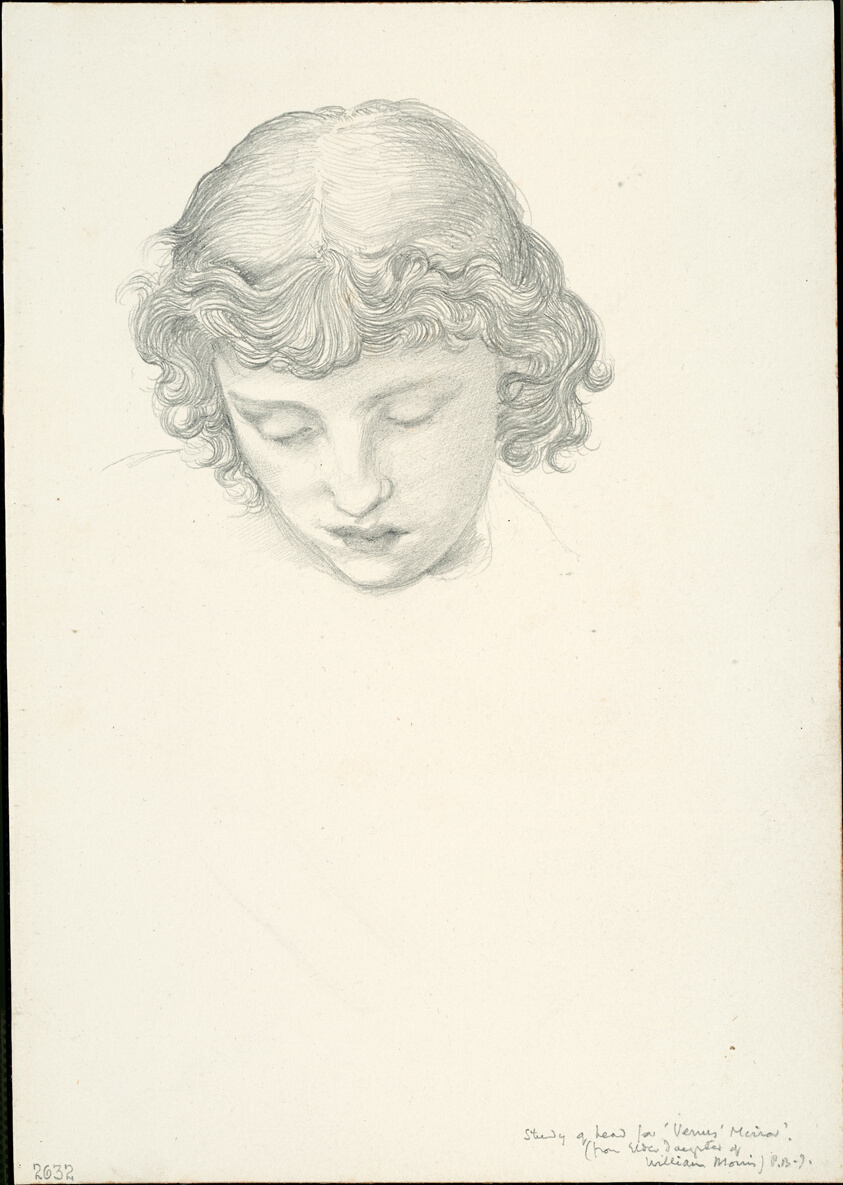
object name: Drawing and Watercolor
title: Study for Mirror of Venus: Head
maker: Sir Edward Burne-Jones (English, 1833-1898)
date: c. 1873–77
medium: Graphite on ivory wove paper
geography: England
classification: graphite; drawings (visual works); prints and drawing